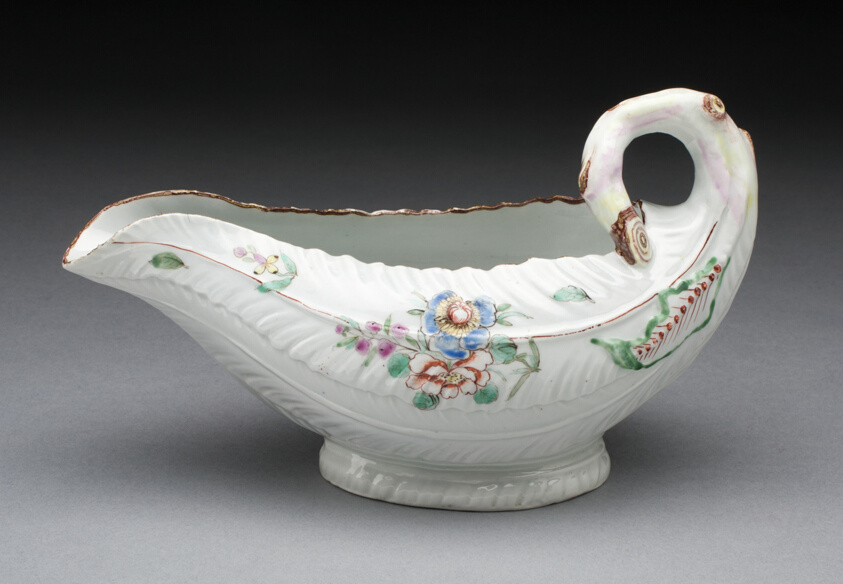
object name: Ceramics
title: Sauceboat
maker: Worcester Porcelain Factory (Warmstry House Period, 1751–1783); Worcester, England, founded 1751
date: c. 1755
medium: Soft-paste porcelain with polychrome enamels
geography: Worcester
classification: ceramics; tableware; porcelain; european decorative arts